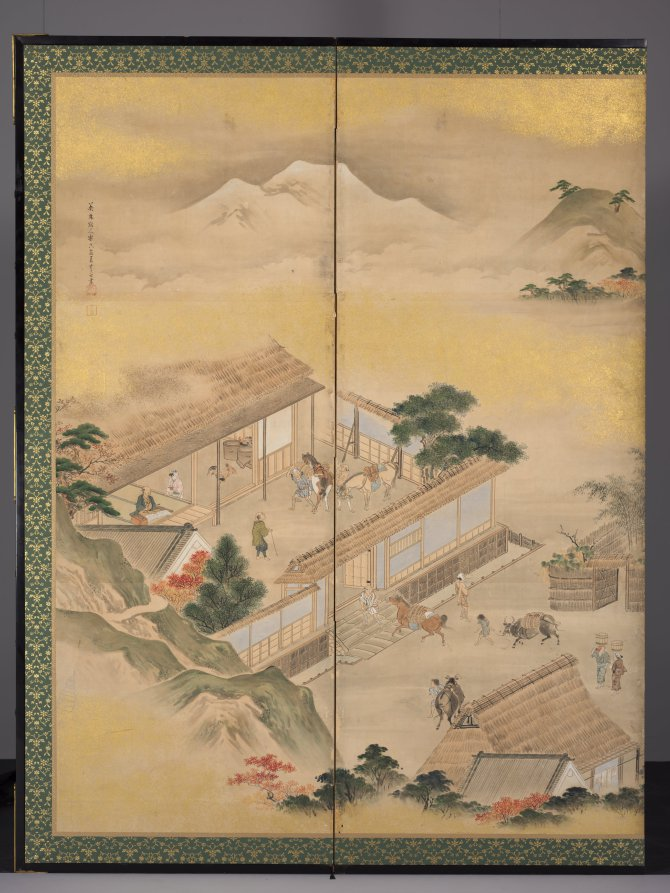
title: Spring and Autumn Farming (Autumn)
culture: Japan, Edo period (1615–1868)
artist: Kō Sūkoku (Japanese, 1730–1804)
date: 1700s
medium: Six-panel folding screen, ink, light color, gold, and silver on paper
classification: Painting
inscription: Signature of the artist: "Enrin san jin Rakushisai ko Sukoku ga" (each screen)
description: These screens present the cycle of the farming year, starting with spring at right and ending with fall at left. Close examination of these screens reveals moments of games and amusement, the enjoyment of meals as well as intellectual and spiritual pursuits interspersed among the scenes of cultivating and preparing the rice harvest. The artist Kō Sūkoku is considered the 18th-century heir in style and attitude to Hanabusa Itchō (1652–1724). Itchō’s work incorporated elements from Kano school, ukiyo-e, and literati styles of painting. Kō trained with one of Hanabusa’s pupils, Sawaki Sūshi, who was best known for scenes depicting everyday life and customs.